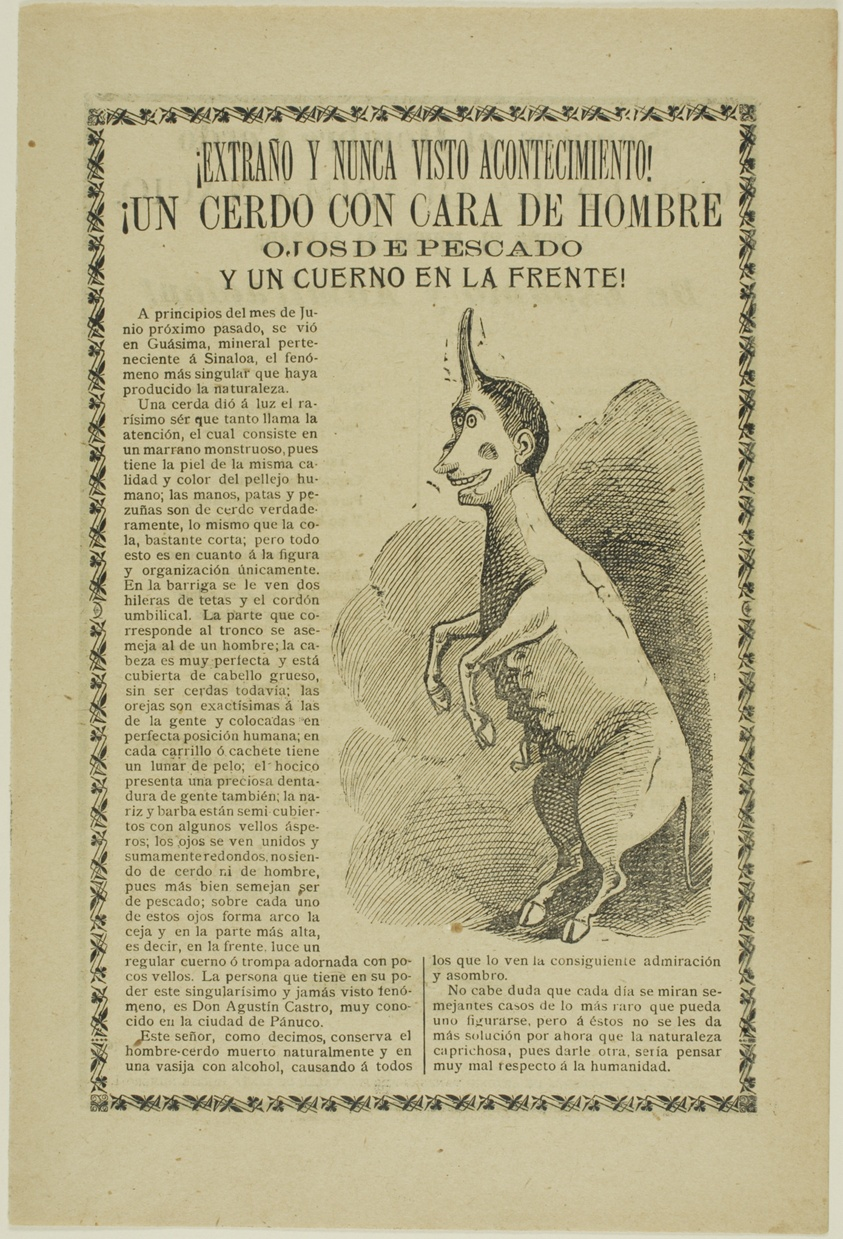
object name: Print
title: Strange and Unheard of Event! A Pig with the Face of a Man, Eyes of a Fish, and a Horn on His Forehead!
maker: José Guadalupe Posada (Mexican, 1852-1913)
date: 1900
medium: Photo relief etching on wove paper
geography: Mexico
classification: woodcut; print; prints and drawing